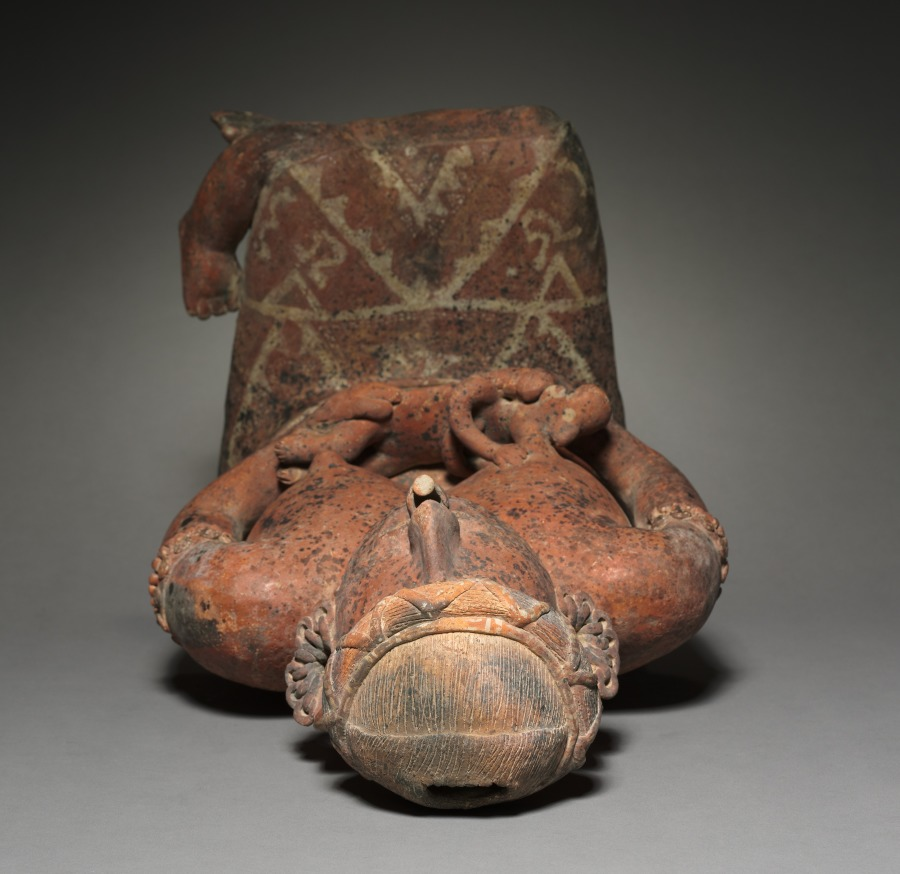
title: Female Seated Figure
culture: Mexico, Nayarit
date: 100 BCE–300 CE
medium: ceramic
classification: Ceramic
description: This couple-extremely fine examples of their kind-may commemorate the marriage of an important person, such as a chief, but could also represent siblings of a chiefly family. Whatever their relationship, their unity is conveyed by their physical similarities, including their jewelry, which marks high social station. The female is unusual in nursing an infant, likely a reference to generational renewal and the continuation of noble bloodlines. The significance of the male’s activity-beating a turtle-shell drum- is not understood.